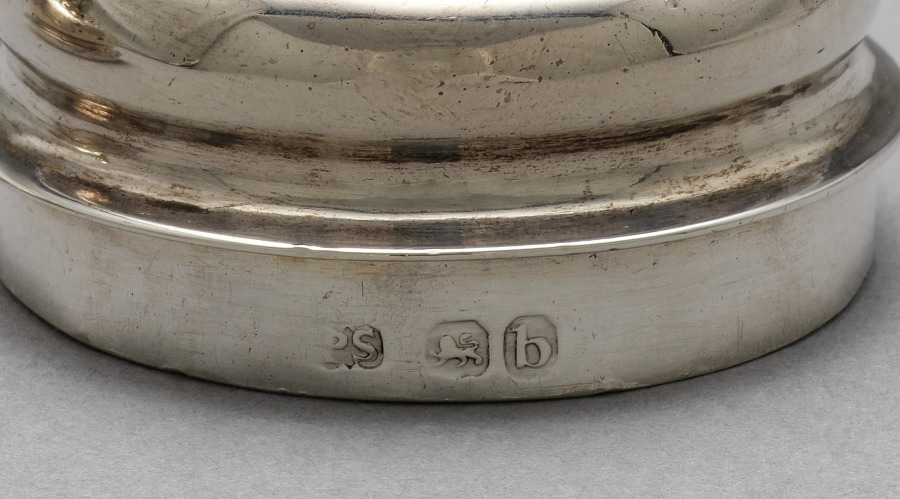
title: Pot (cover)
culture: England, 19th century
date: 1817–18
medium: silver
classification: Silver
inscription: Stamped on lid: "PS", Lion Passant, "b".